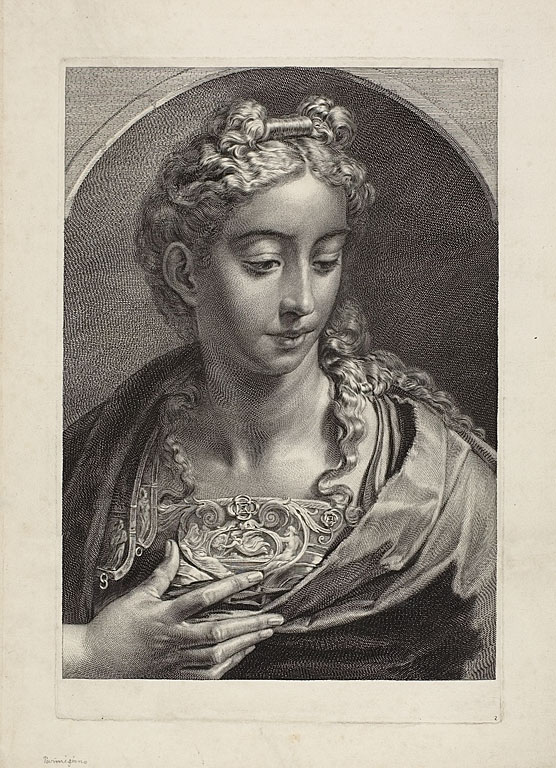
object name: Print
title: Athena, from Cabinet Reynst; Variarum imaginum a celeberrimis artificibus pictarum Caelaturae (Cabinet Reynst: Engravings of various images painted by famous artists)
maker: Cornelis Visscher (Dutch, c. 1628-1658); after Parmigianino (Italian, 1503-1540)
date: c. 1650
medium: Engraving in black on cream laid paper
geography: Holland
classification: engraving; print; prints and drawing